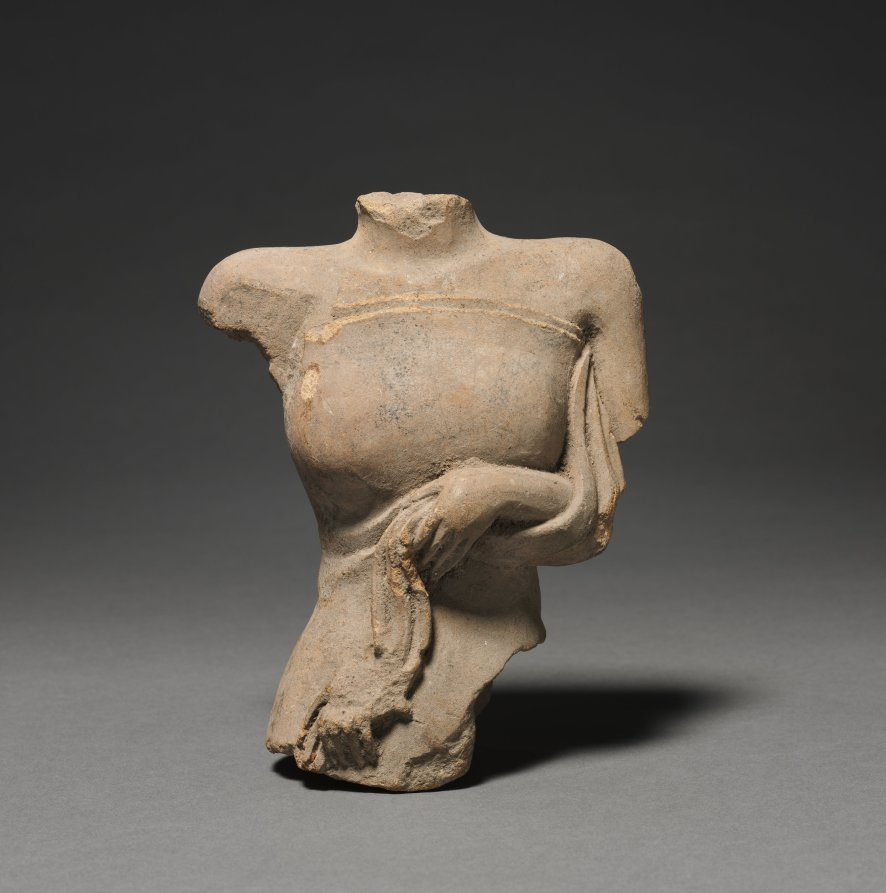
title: Female Torso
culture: Eastern Java, Majapahit Dynasty (1293-1478)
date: Majapahit Dynasty (1293–1478)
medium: terracotta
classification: Sculpture